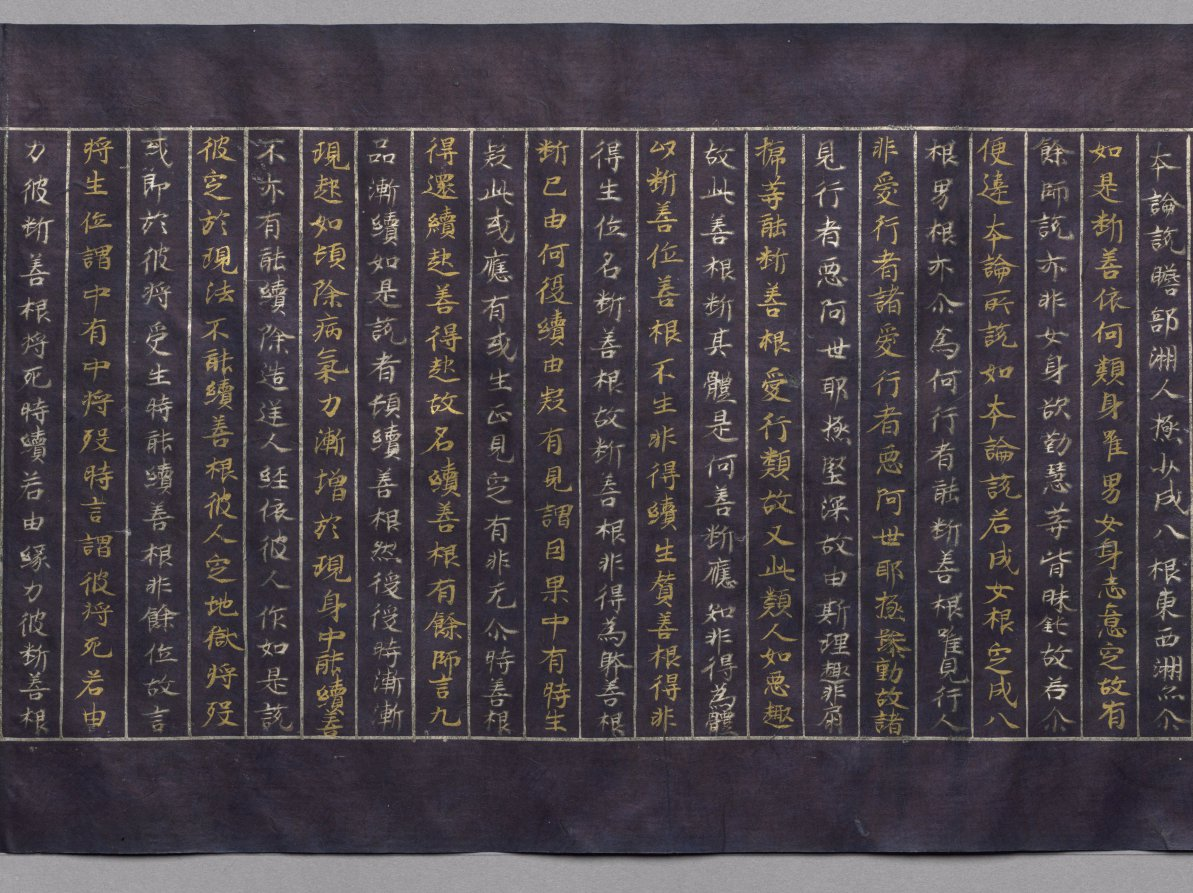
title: Meta-Discourse on the Teachings from the Treasury (Abidharmakosha-Bhashya)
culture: Japan, Heian period (794–1185)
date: 1100s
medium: handscroll; gold and silver on indigo-dyed paper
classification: Manuscript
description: This religious text relates some of the teachings of the great fourth-century Indian Buddhist scholar Vasubhandhu. The text analyzes human consciousness in its relationship to the environment and transformations that occur during meditation. This scroll is the 17th part of a 30-part translation of the text by Xuanzang, an eminent seventh-century Chinese monk.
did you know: The frontispiece depicts the Buddha Shakyamuni preaching in a paradisical landscape.